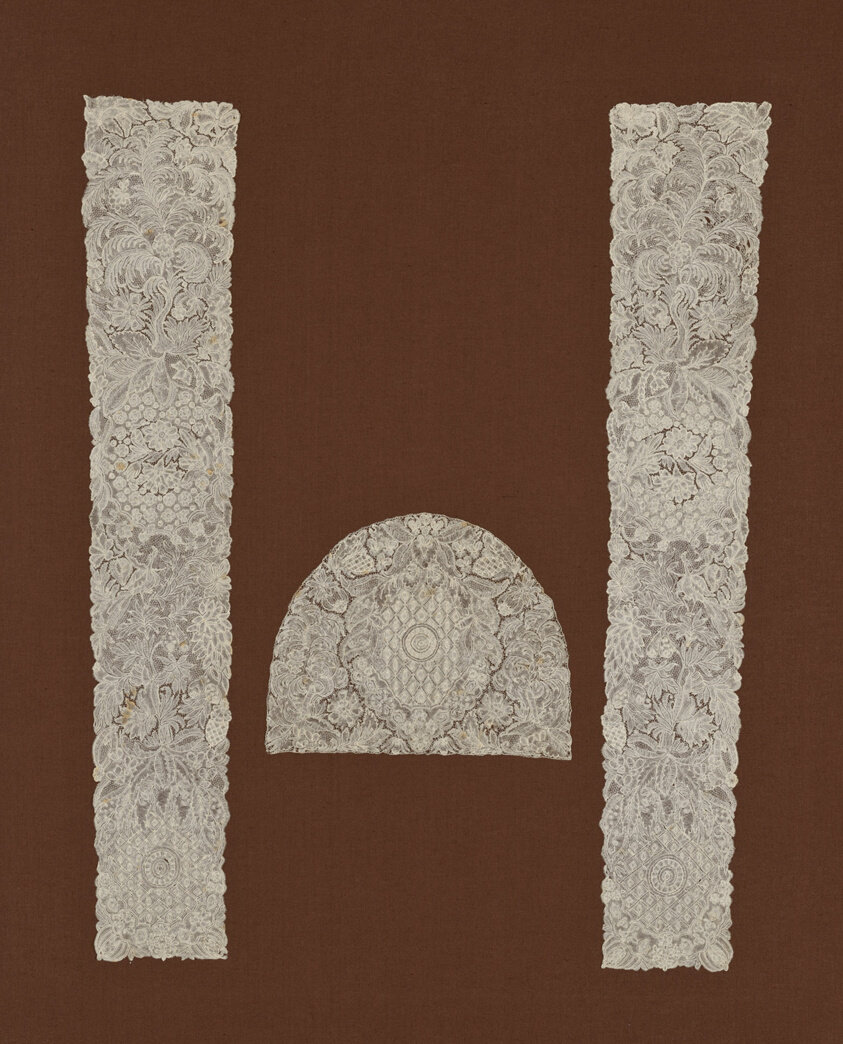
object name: Costume and Accessories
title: Cap Crown and a Pair of Lappets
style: 18th Century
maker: Flanders, Brussels (modern day Belgium)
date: 1720s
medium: Linen, bobbin part lace of a type known as "Brussels"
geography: Flanders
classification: costume accessory; lace - bobbin; lace; textile; costume - lace; costume accessory - headdress; costume accessory worn above the waist; headdress; costume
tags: floral motifs, diamond shapes, flowers, foliage